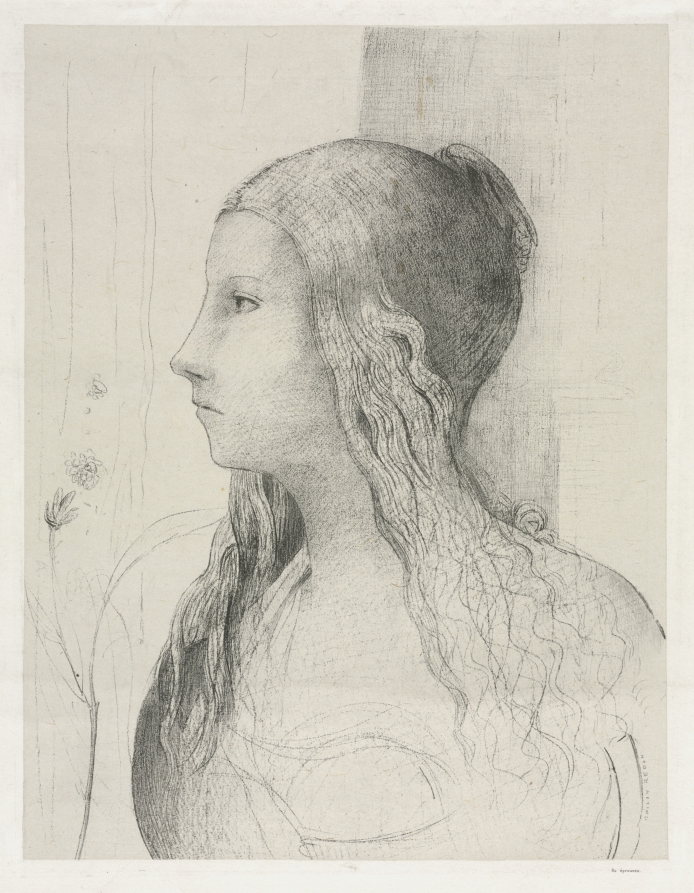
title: Brünnhilde in Twilight of the Gods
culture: France, 19th century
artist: Odilon Redon (French, 1840–1916)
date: 1894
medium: lithograph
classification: Print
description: This print shows Odilon Redon’s passion for the music of 19th-century German composer Richard Wagner. Brünnhilde is a main character in the final chapter of Wagner’s The Ring of the Nibelung, an epic four-part operatic piece composed over several decades. Created after Redon’s extensive experimentation with and mastery of lithography, the print reveals the medium’s similarity to drawing in the range of marks used to sketch its subject. Redon delicately outlined flowers in the background and crosshatched to highlight Brünnhilde’s face before turning his crayon on its side to darken her hair and chest.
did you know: This is the second lithograph Redon created depicting Brünnhilde. The first was published in the journal la Revue wagnérienne and shows her as a fierce warrior with a helmet, shield, and armor.